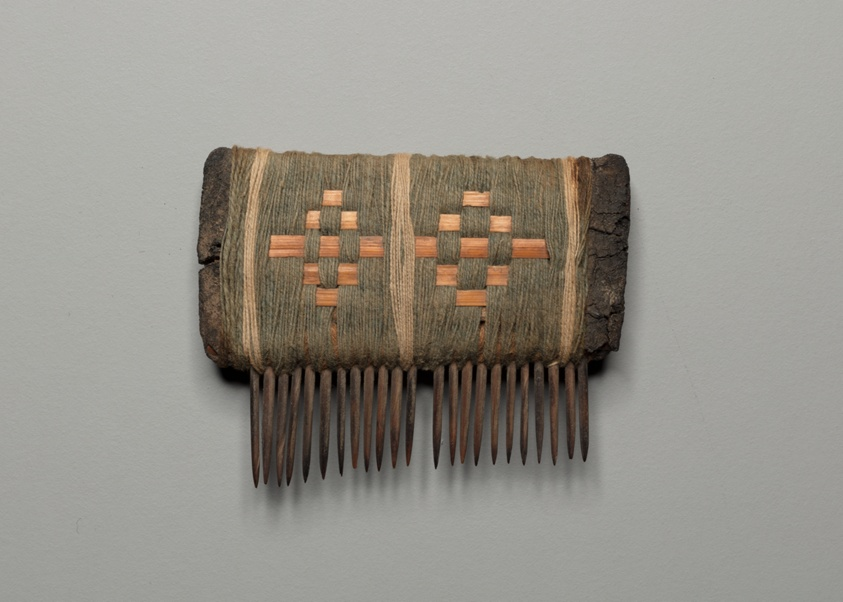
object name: Textile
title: Weaving comb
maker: Peru, Possibly central coast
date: 1000/1476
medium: Wood, cotton, split reed and resin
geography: Peru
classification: textile; textile working equipment; weaving; accessories (object genre)